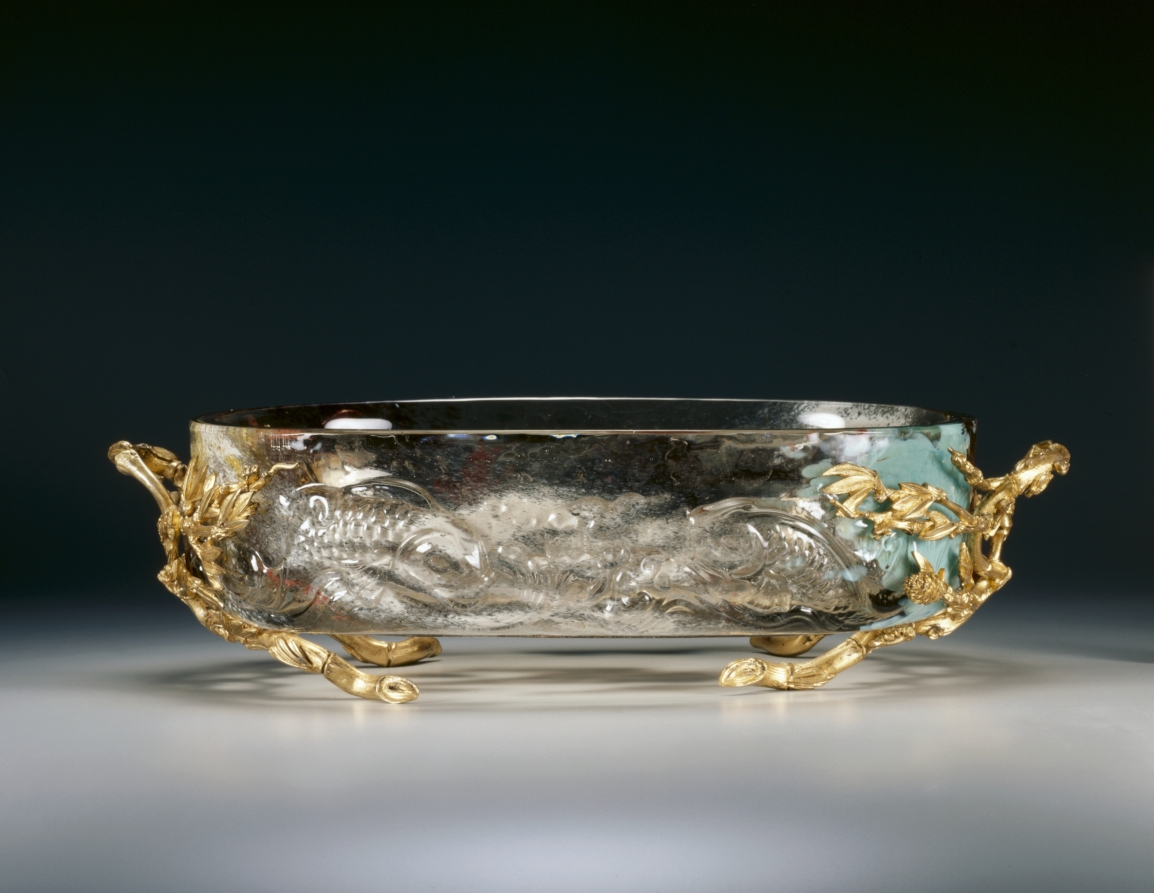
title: Centerpiece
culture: France, Paris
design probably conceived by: Eugène Rousseau (French, 1827–1891)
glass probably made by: firm of Appert Frères (French)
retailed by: firm of Escalier de Cristal (French)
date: c. 1880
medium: glass with gilt metal mounts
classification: Glass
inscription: on underside of glass: Escalier de Cristal. Paris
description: The retail firm of Escalier de Cristal seems not to have directly manufactured the wares they sold, but they exercised design control and sometimes brought together craftspeople of various talents and training to execute their stylish goods. Eugène Rousseau was not himself a craftsman, but he acted as a sort of editor, and glass and ceramics were made under his supervision. The glass of this bowl, with its cast relief decoration and colored inclusions, is of a kind associated with Rousseau. It is known that much of his glass was actually made by the firm of Appert Frères. In terms of style, this Centerpiece reflects the interest in things Japanese, which was an important element in the luxury goods made around 1880. The swimming fish and the naturalistic details of the gilt metal pinecones and twigs tied with string suggest this Asian source of inspiration.